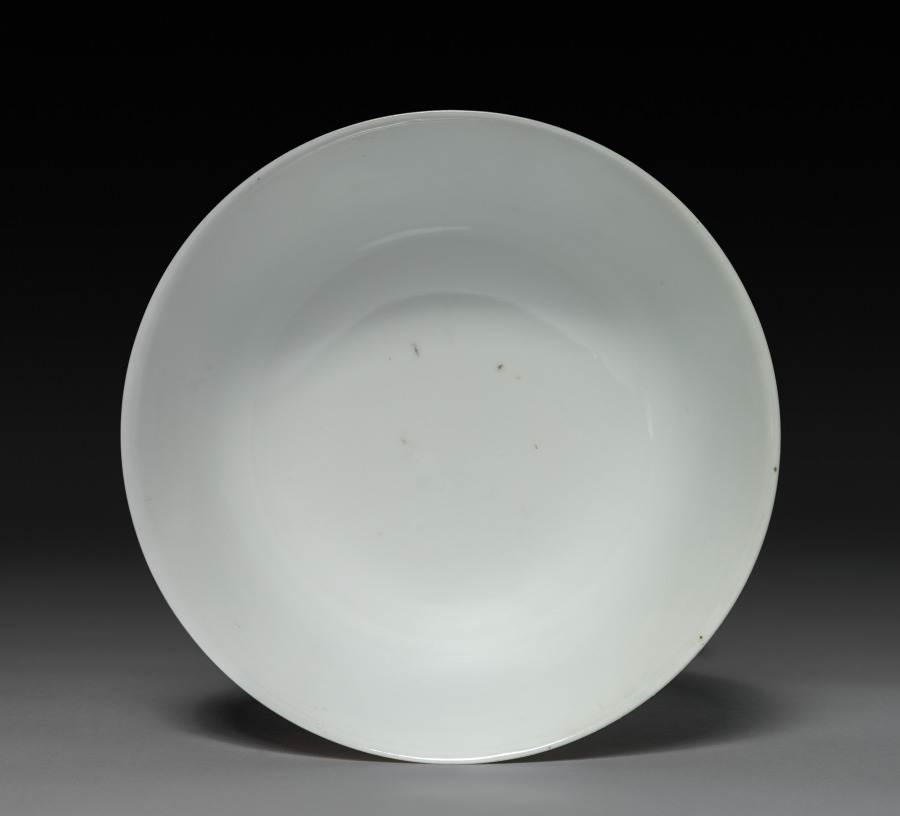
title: Five-color Bowl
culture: China, Qing dynasty (1644-1911), Daoguang reign (1821-1850)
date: 1821–1850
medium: porcelain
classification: Ceramic